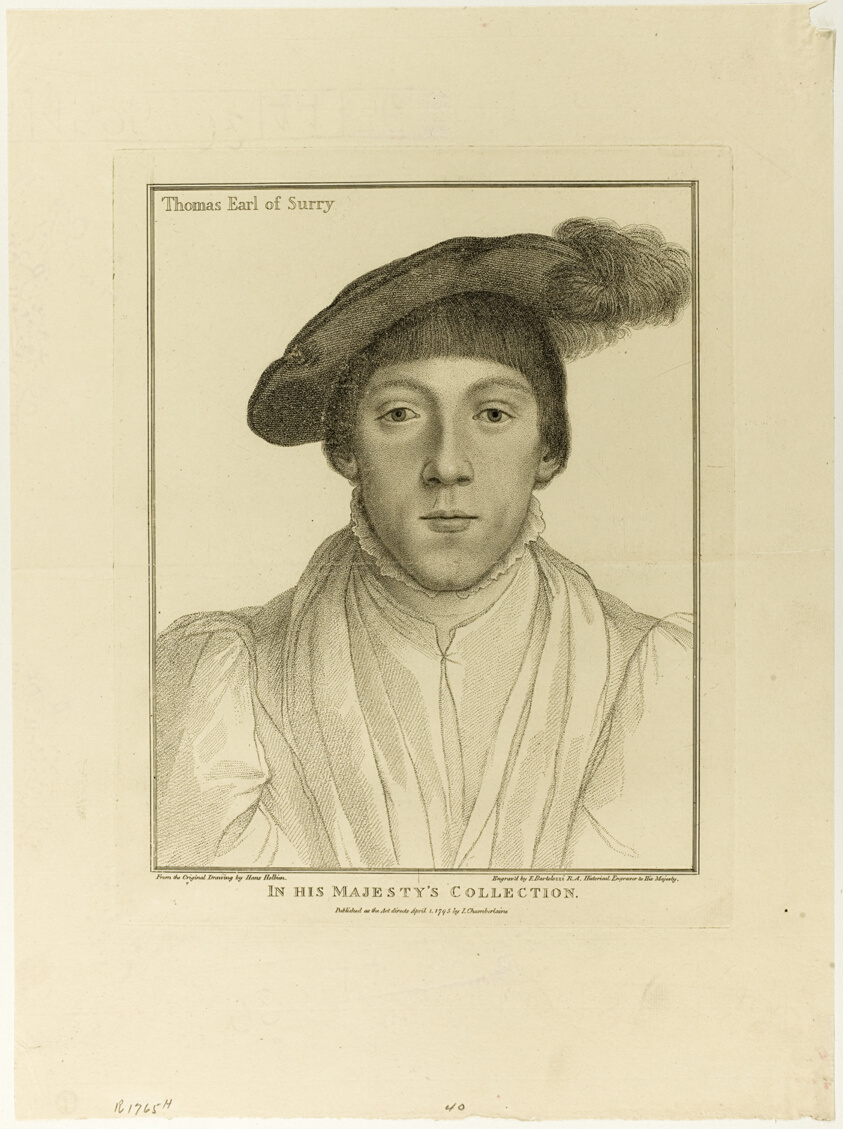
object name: Print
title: Thomas Earl of Surrey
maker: Francesco Bartolozzi (Italian, 1727-1815); after Hans Holbein the younger (German, 1497-1543)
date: April 1, 1795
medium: Stipple engraving on cream wove paper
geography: Italy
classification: engraving; print; prints and drawing